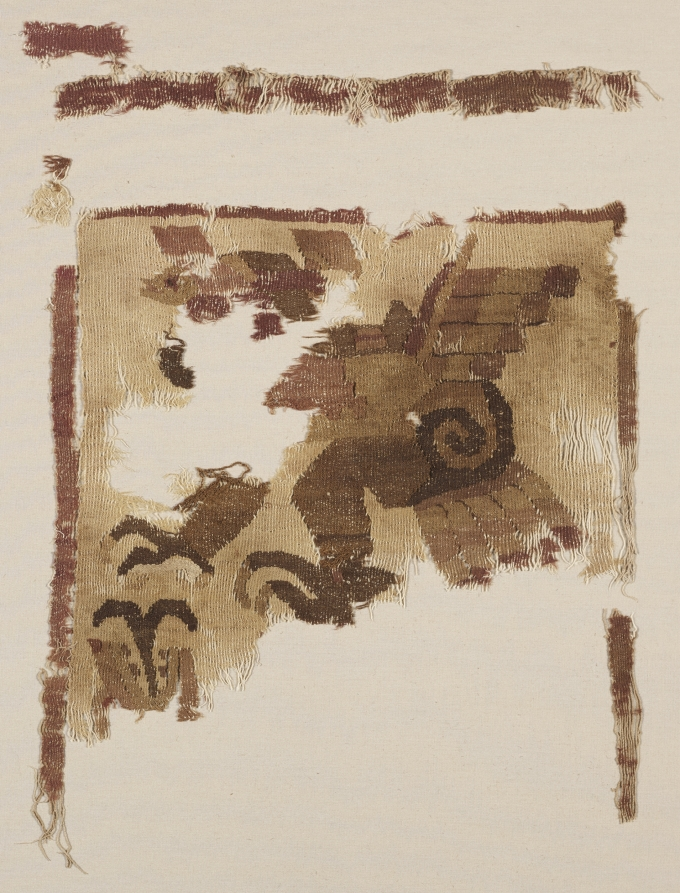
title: Textile Fragment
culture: Peru, Moche, north coast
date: c. 50–650 CE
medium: cotton and camelid fiber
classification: Textile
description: This fragment, one of several in the collection, is a rare survivor of catastrophic rains that destroyed much of the Moche textile legacy and may have helped to bring about the decline of Moche culture. It depicts a serpent and a snail beneath a hovering raptorial bird—perhaps a snail kite, a type of hawk named after its favored food. The size of the motifs implies that the original textile was large; a mantle (a shawl-like garment) or a hanging are among the possibilities.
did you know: This fragment is a rare survivor of floods that destroyed much of the Moche textile record.